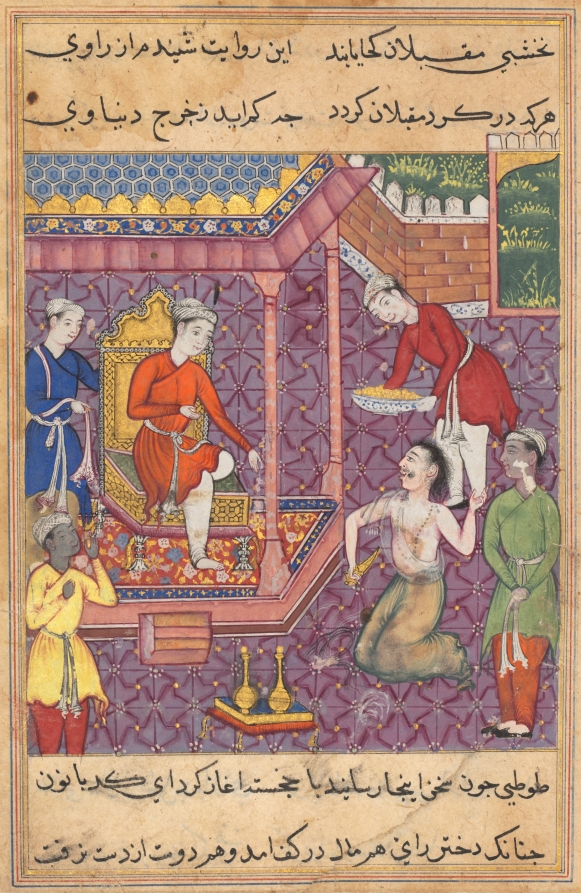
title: The magician disguised as a Brahman returns to claim his “daughter-in-law,” from a Tuti-nama (Tales of a Parrot): Thirty-fifth Night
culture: Mughal India, court of Akbar (reigned 1556–1605)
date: c. 1560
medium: gum tempera, ink, and gold on paper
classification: Painting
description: The story continues with a ruse to allow the Brahman and the princess to escape the king’s son and live happily ever after. The magician transformed the lovers into men, so they were able to leave the palace unrecognized. In order to garner a fortune on which they could support themselves, the magician approached the king in the guise of a Brahman to reclaim the woman he had entrusted to the harem and who he said was his daughter-in-law. When the king stated that she has disappeared, the magician in the form of a Brahman acted as though he would stab himself to death. The king assuaged him by paying a large sum of money as compensation for losing the woman. A servant brings a blue-and-white porcelain dish full of gold coins. A different artist painted this page without referencing the appearance of either the king or the magician in the guise of a Brahman from the previous page.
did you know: The previous painting, which shows the palace's reaction to the daughter-in-law’s disappearance, is currently in a private collection.